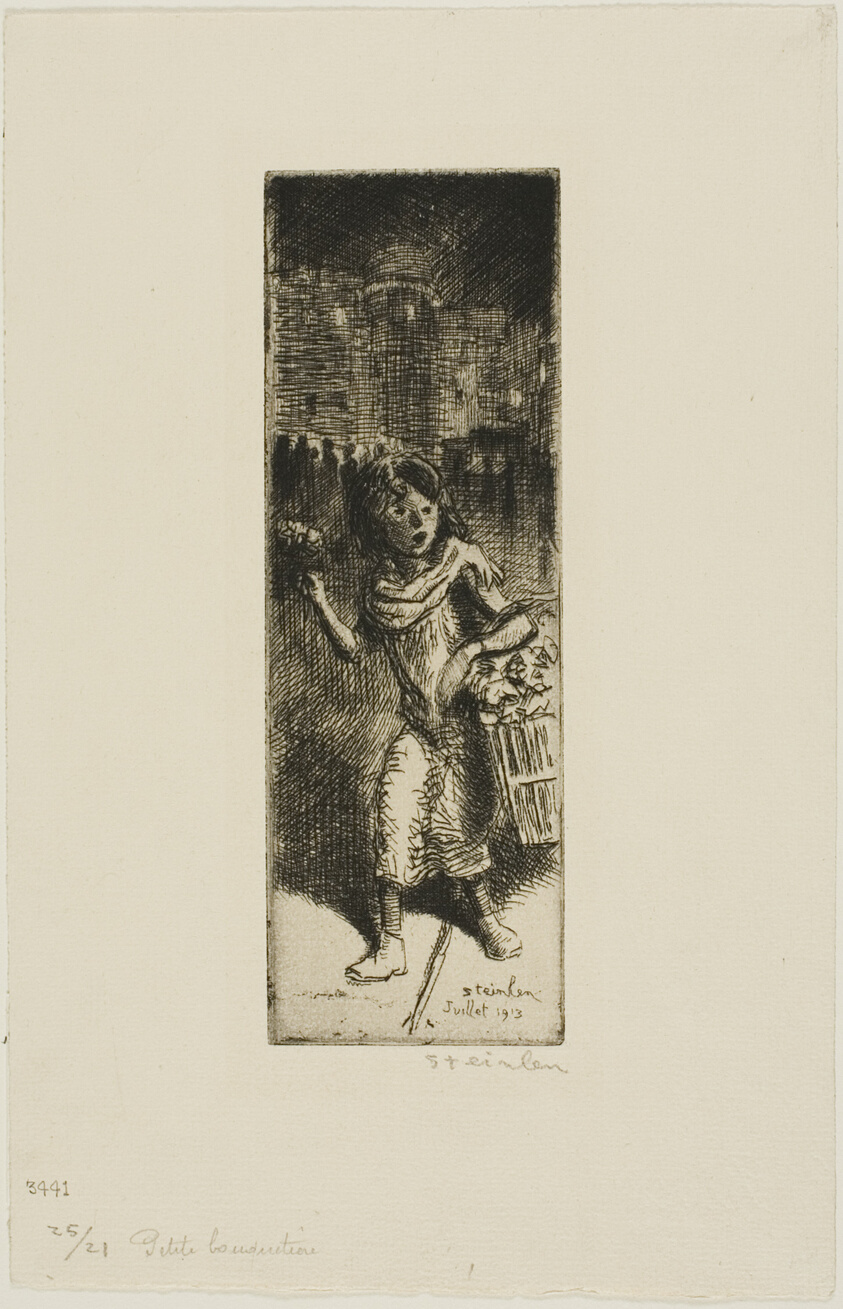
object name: Print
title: Little Flower Girl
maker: Théophile-Alexandre Steinlen; French, born Switzerland, 1859-1923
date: July 1913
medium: Etching on ivory laid paper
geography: France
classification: etching; print; prints and drawing